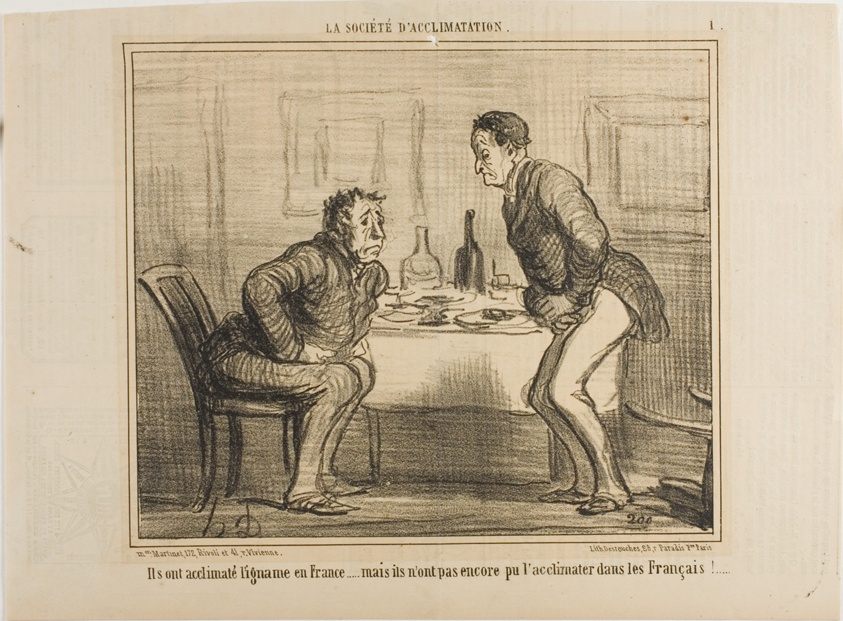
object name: Print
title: They succeeded in acclimatizing the Indian potato to the French climate, but it is still a problem to acclimatize the French to the Indian potato!, plate 1 from La Société D'acclimatation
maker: Honoré Victorin Daumier; French, 1808-1879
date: 1858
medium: Lithograph in black on buff wove paper, with letterpress verso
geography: France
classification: lithograph; print; prints and drawing